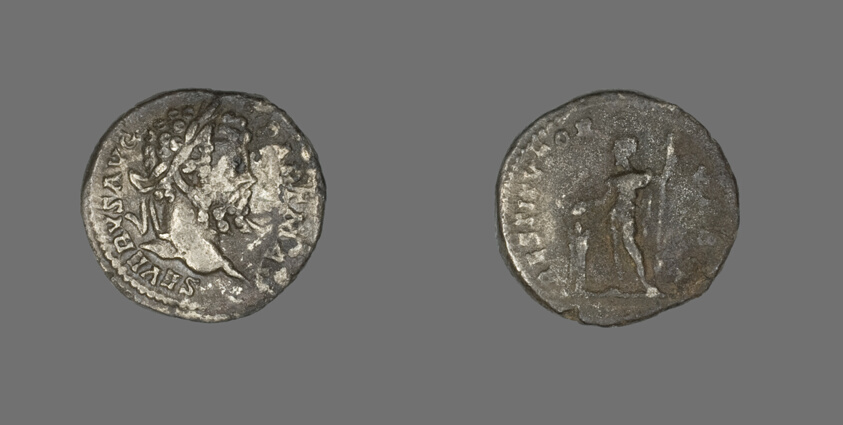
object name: Coin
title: Denarius (Coin) Portraying Emperor Septimius Severus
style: roman (ancient, style or period)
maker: Roman, minted in Rome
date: 200-201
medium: Silver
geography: Roman Empire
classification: coin; ancient art